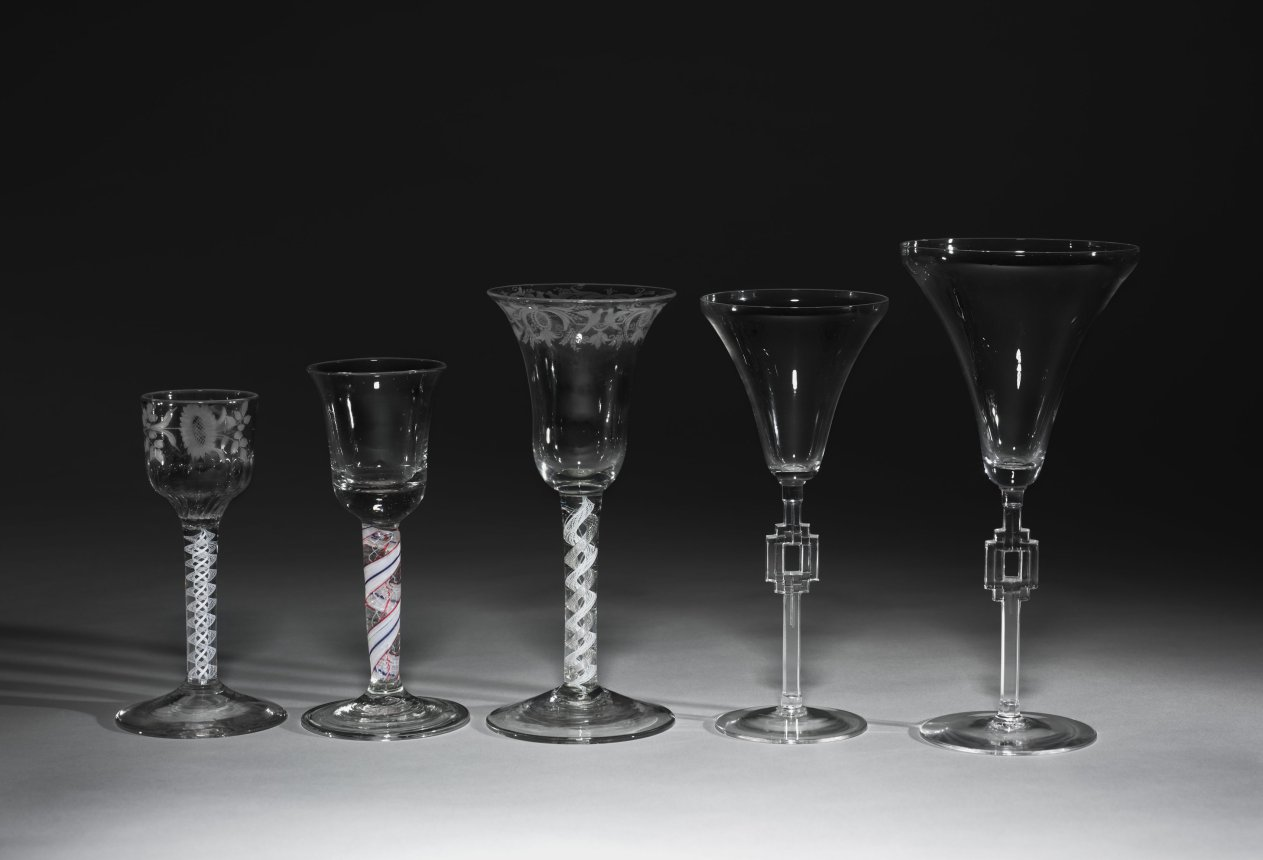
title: Goblet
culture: England, 18th century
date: c. 1725–1750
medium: glass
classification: Glass